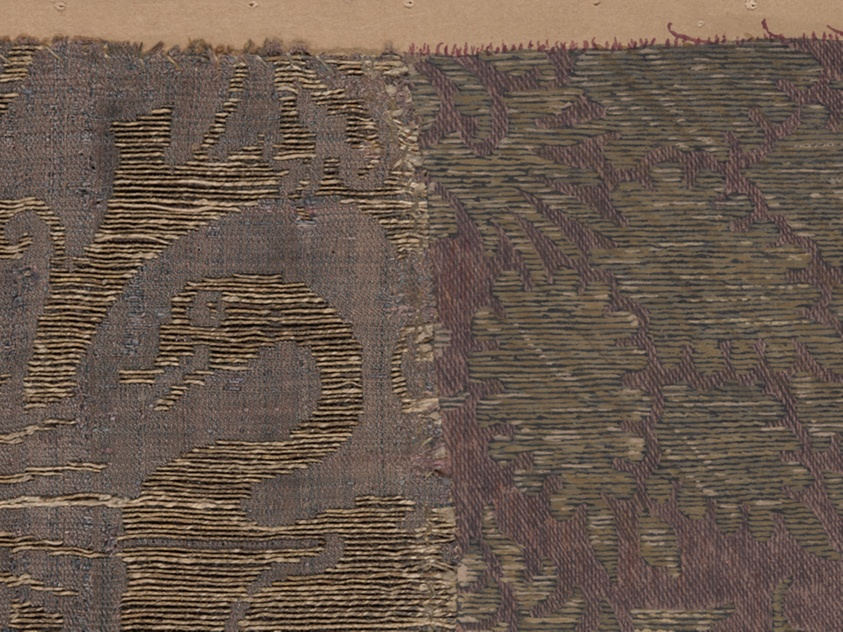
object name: Textile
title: Fragment Supplemented with Drawing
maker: Paul Schulze; Italy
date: 14th century and 19th century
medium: Watercolor with opaque and metallic gold watercolor over pen and crimson and black ink with a swatch of compound twill satin, plain weave, on brown wove paper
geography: Italy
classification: textile; weaving